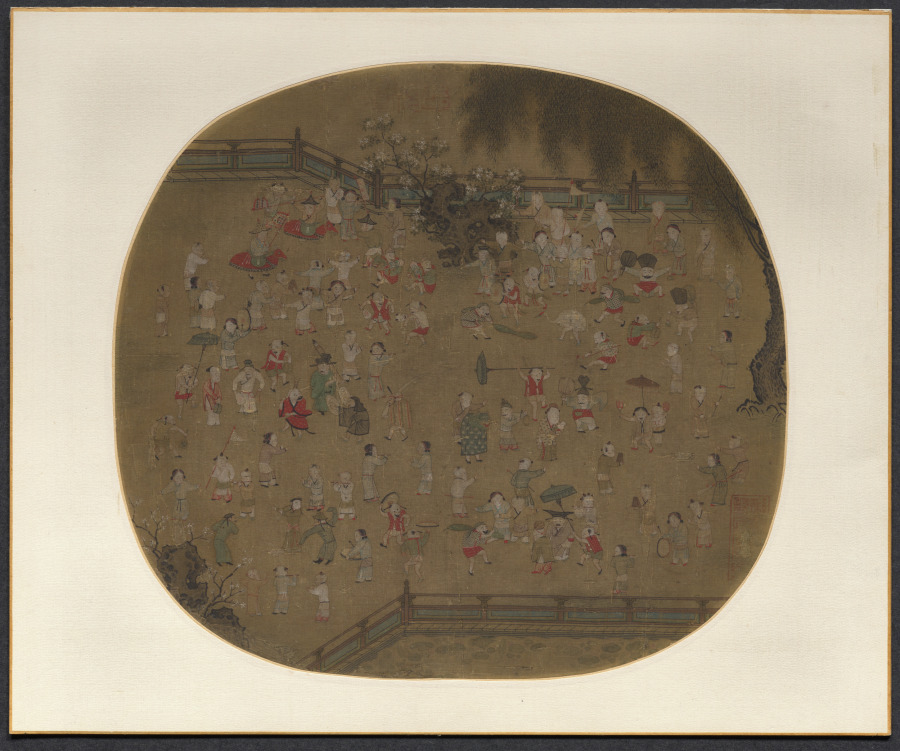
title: One Hundred Children at Play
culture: China, Southern Song dynasty (1127-1279)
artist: tradition of Su Hanchen (Chinese, active c. 1101–1125)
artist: tradition of Wang Juzhen (Chinese)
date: 1100s–1200s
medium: Album leaf; ink and color on silk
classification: Painting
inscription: 2 seals unidentified: one lower right and one top center.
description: Paintings on the “one hundred children” theme usually have numerous, if not exactly 100, children. A majority of the children here imitate the dress, manners, and activities of the adult world. Whatever the exact significance of the subject, the painter of this album leaf clearly intended it to be savored figure by figure. With seemingly inexhaustible invention, the artist characterized each performer in the colorful pageant with unique accoutrements and action. The avoidance of overlapping allows each figure to be seen in clear detail, while all the figures are organized into a coherent composition. Garden settings with decorative rocks, blossoming shrubs, graceful willows, and lotus ponds had become fairly standard environments for late 12th- to 13th-century scenes of palace ladies as well as of playing children.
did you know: Following a baby’s birth, ceremonies and festivities traditionally marked the baby’s successive attainment of thirty days, one hundred days, and one year in age. “One hundred children” paintings such as this album leaf would have been suitable for presentation on either of the latter occasions.